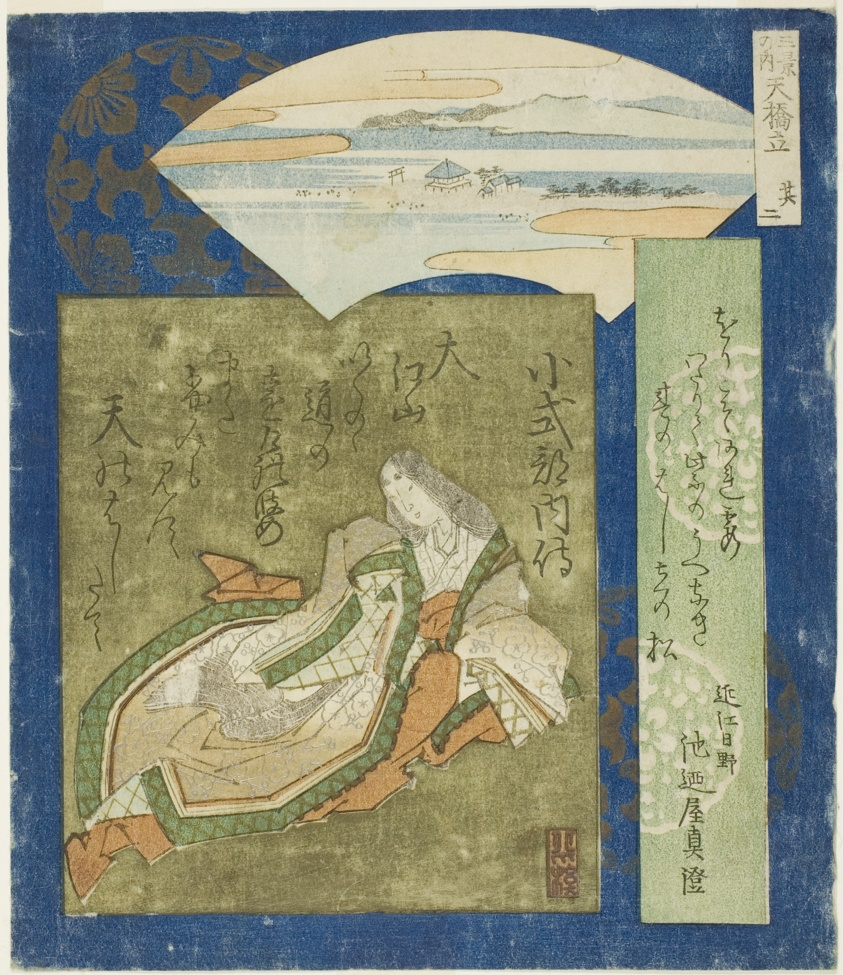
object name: Print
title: Amanohashidate: Koshikibu no Naishi, No. 2 from "Three Famous Scenes (Sankei no uchi: Sono ni)"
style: Japanese (culture or style)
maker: Totoya Hokkei (Japanese, 1780–1850)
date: c. 1833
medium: Color woodblock print; center sheet of shikishiban triptych (right: 1954.745, left: 1954.589), surimono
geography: Japan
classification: woodblock print; print; asian art